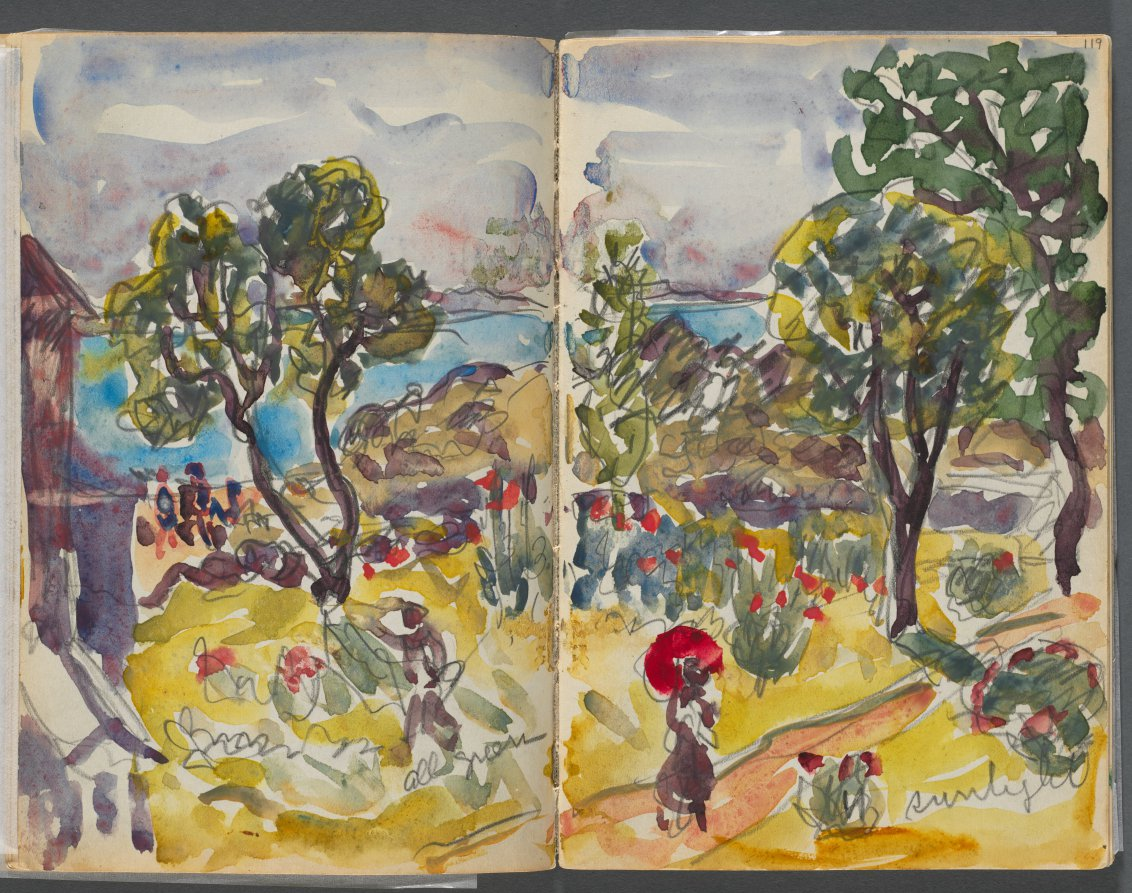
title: Sketchbook- The Granite Shore Hotel, Rockport, page 118 &119: Garden View with Notations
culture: America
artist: Maurice Prendergast (American, born Newfoundland [now Canada], 1858–1924)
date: 1905–10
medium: graphite and watercolor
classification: Bound Volume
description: This sketchbook contains 72 pages of pencil drawings and 9 watercolors of Cape Ann. On the inside of the cover Prendergast wrote the address of the Granite Shore Hotel in Rockport, Massachusetts.